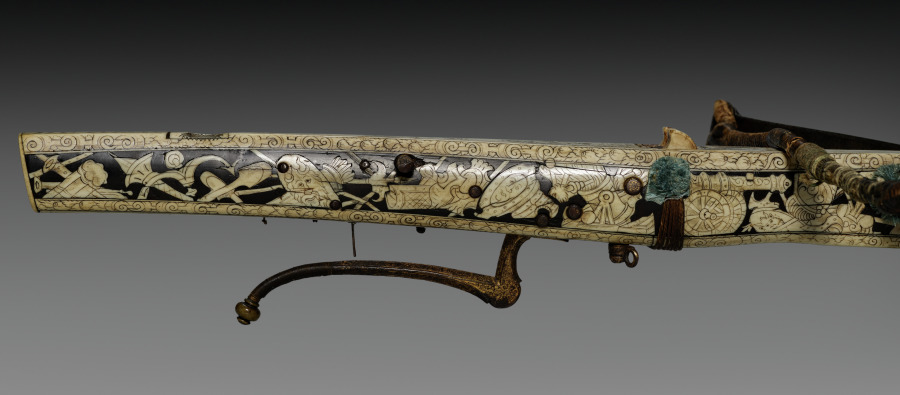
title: Crossbow of Elector Augustus I of Saxony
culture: Germany, Saxony, 16th century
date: c. 1553–73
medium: wood (walnut?), bone veneers, flax cord, steel (etched, traces of gilding). woolen pompoms, stock decorated wih inlaid trophies of arms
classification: Arms and Armor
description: This crossbow was a hunting weapon for Prince Elector Augustus I, a member of the ruling elite in the Holy Roman Empire. Augustus, powerful and wealthy, had even the most practical instruments ornately decorated, including this crossbow and its cranequin, or winding device.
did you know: Augustus was a marksman who took part in crossbow competitions. He had a large collection and often gave them to friends.